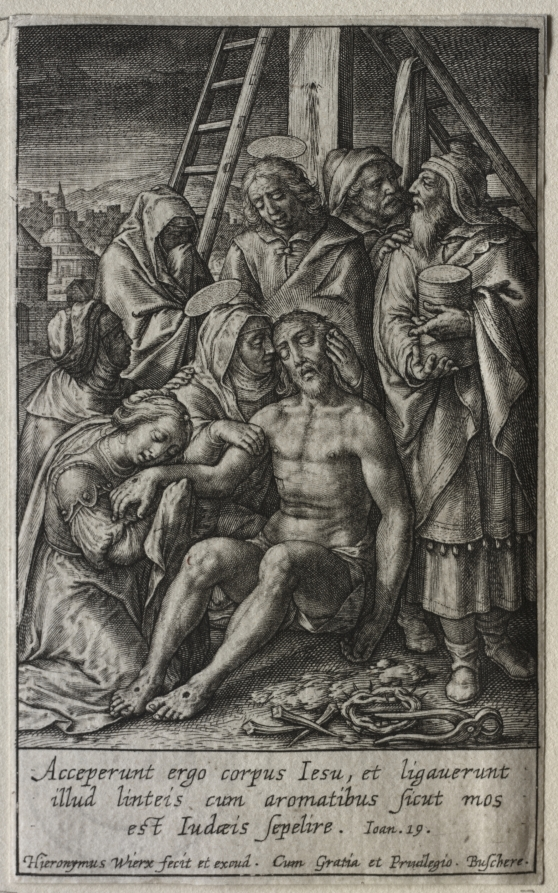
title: The Passion: The Lamentation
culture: Flanders, late 16th-early 17th century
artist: Hieronymus Wierix (Flemish, 1553–1619)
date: before 1619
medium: engraving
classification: Print